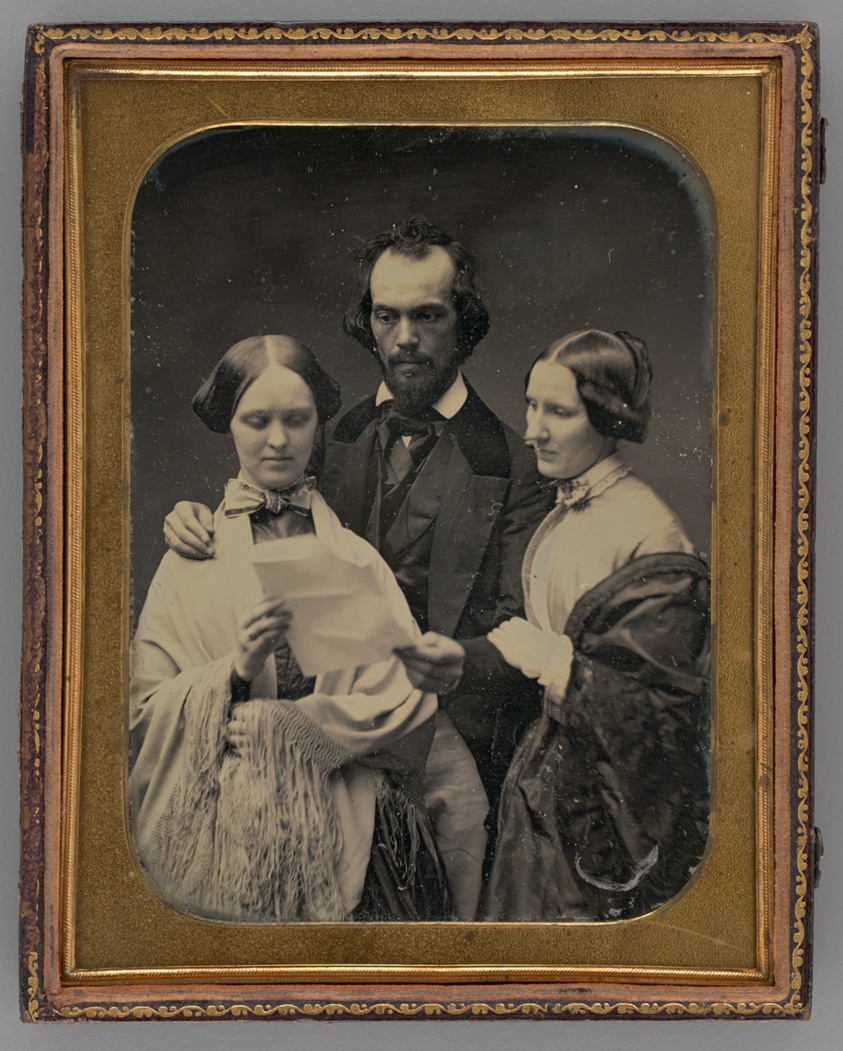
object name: Photograph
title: Untitled (Portrait of Two Women and One Man)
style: 19th century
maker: Unknown maker; American, 19th century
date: 1855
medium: Daguerreotype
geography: United States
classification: portrait; photograph; photographic process; photography; portrait; daguerreotype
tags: lundberg collection, reading, portraits: multiple subjects, portraits: male subject, portraits: female subject, portrait, portraits